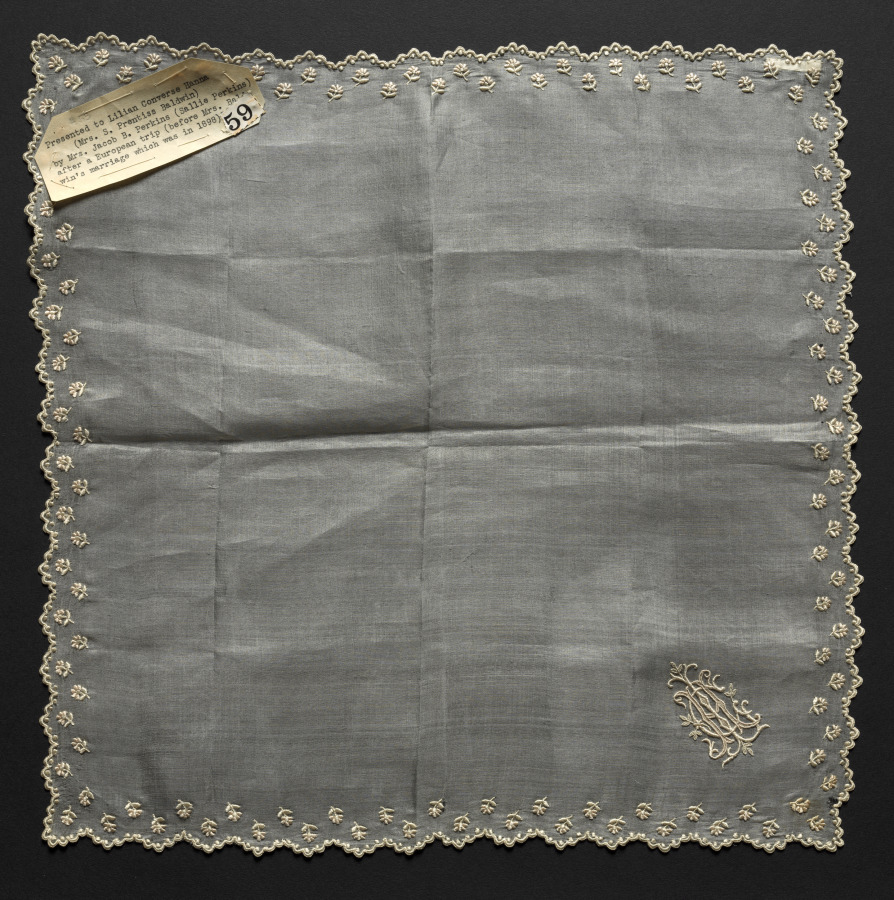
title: Embroidered Handkerchief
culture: Philippines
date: 1880–99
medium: Plain weave piña, silk embroidery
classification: Embroidery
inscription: monogram "L.C.H." in one corner.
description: This square handkerchief is made of piña fiber cloth in plain weave. All four edges are finished with a hand-embroidered cotton border of small repeating floral motifs. One corner bears the embroidered monogram “L. C. H.,” the initials of its first owner, Lilian Converse Hanna.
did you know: Sallie Perkins (Mrs. Jacob B. Perkins) gifted this handkerchief to Lilian Converse Hanna (Mrs. S. Prentiss Baldwin) before the latter’s marriage in 1898.